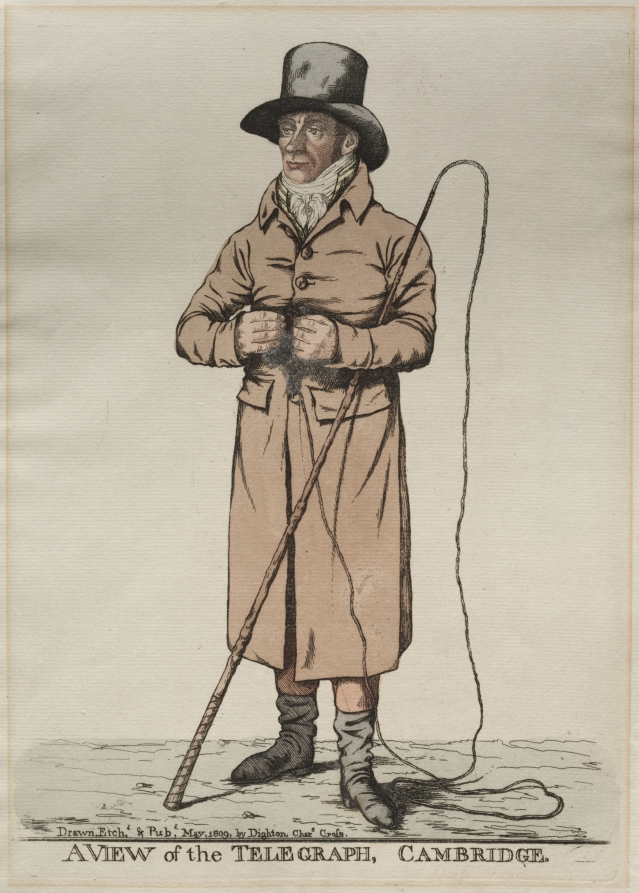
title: A View of the Telegraph, Cambridge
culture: England, 19th century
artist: Richard Dighton (British, 1795–1880)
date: 1809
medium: etching, hand colored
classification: Print